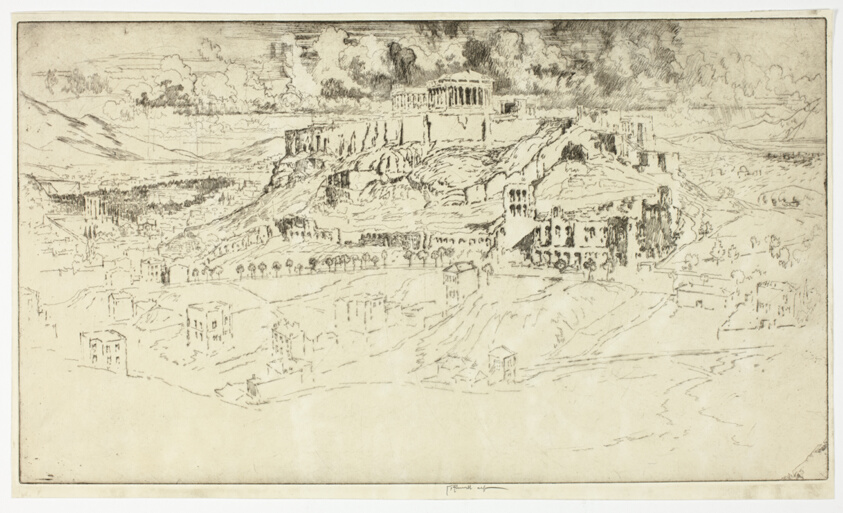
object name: Print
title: Athens from the Tomb of Philopotes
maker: Joseph Pennell (American, 1857-1926)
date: 1913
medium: Etching on cream wove paper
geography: United States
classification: lithograph; print; prints and drawing